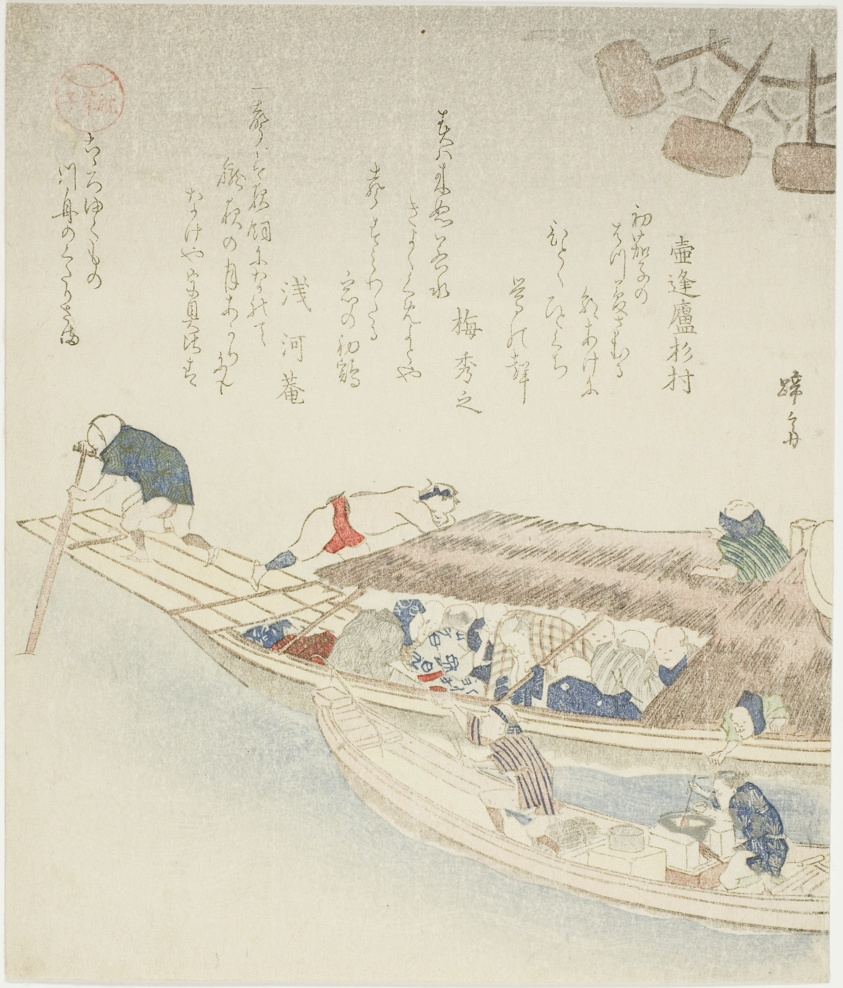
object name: Print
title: Ferry boat on the Yodo River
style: Japanese (culture or style)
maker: Teisai Hokuba (Japanese, 1771-1844)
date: c. 1815/25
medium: Color woodblock print; shikishiban, surimono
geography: Japan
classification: woodblock print; print; asian art